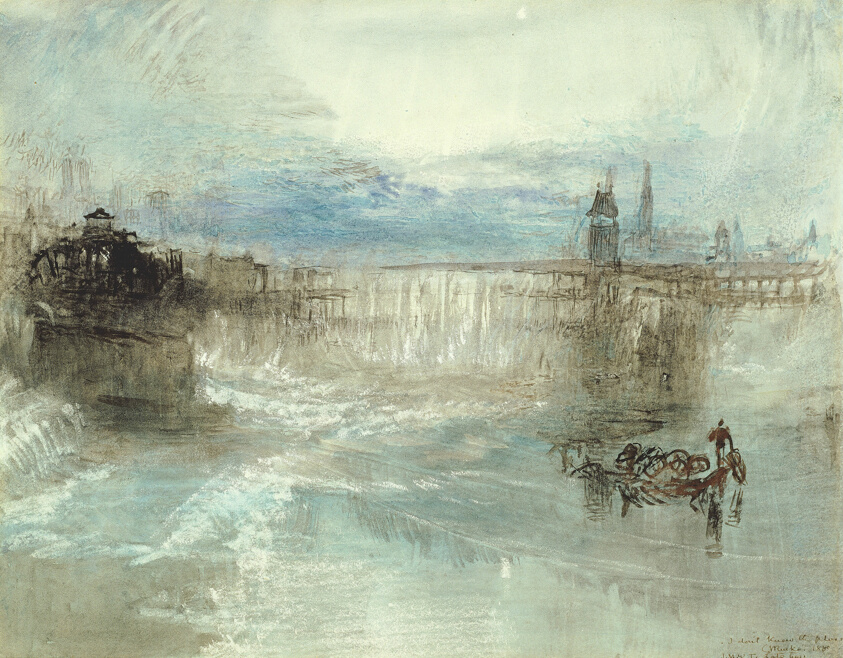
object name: Drawing and Watercolor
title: View of Lucerne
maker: Joseph Mallord William Turner (English, 1775-1851)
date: 1840/41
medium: Watercolor, with scraping on white wove paper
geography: England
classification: watercolor; drawings (visual works); prints and drawing